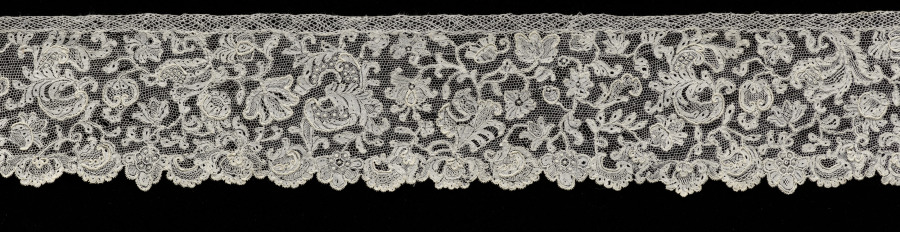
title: Lace Edging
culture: France, Alençon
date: 1700s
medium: Linen: needle lace (Point d'Alençon)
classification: Lace